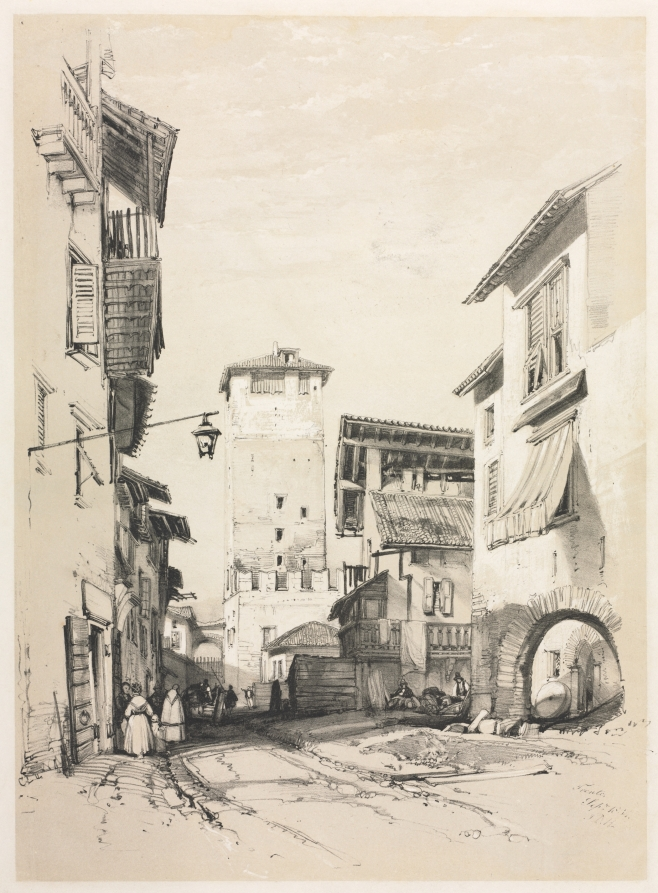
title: Sketches at Home and Abroad: Trento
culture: England, 19th century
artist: James Duffield Harding (British, 1798–1863)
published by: Charles Tilt, Fleet Street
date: 1834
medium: lithograph with yellow-grey tint stone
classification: Print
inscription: Inscribed in stone, lower right: "Trento Sepr 1834 J.D.H."